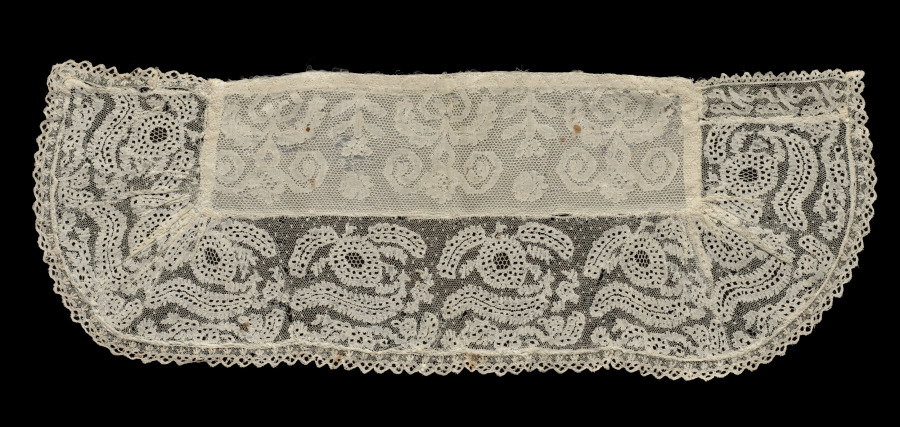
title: Lace Cap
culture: Belgium (Flanders)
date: 1800s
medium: Linen: bobbin lace (Flemish lace and Lille lace), mesh ground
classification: Lace